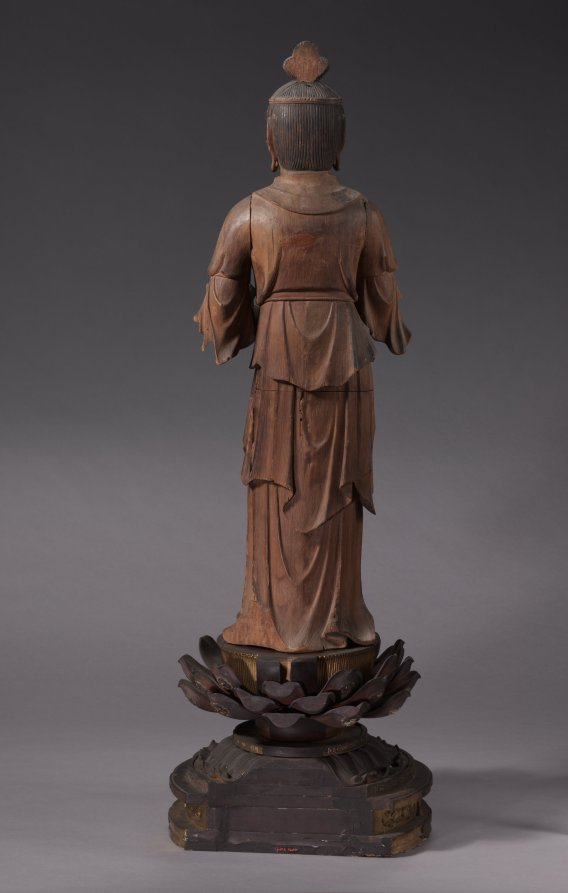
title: Batō (Horse-Headed) Kannon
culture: Japan, Kamakura period (1185–1333)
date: early 1300s, pedestal 1600s–1700s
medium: Wood with traces of color and gold; pedestal: wood with lacquer, color, and gold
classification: Sculpture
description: Batō Kannon, or Hayagriva Avalokiteshvara in Sanskrit, is the “horse-headed” form of the bodhisattva of compassion, who presides over the realm of animals in the Buddhist Six Realms of Transmigration (rebirth). A horse’s head appears in the hair of this sculpture to identify it. Bodhisattvas are beings who, though enlightened, choose to remain within the worlds of existence to help others. The six realms are heaven, hell, human, animal, hungry ghost, and ashura, or fierce supernatural entities.